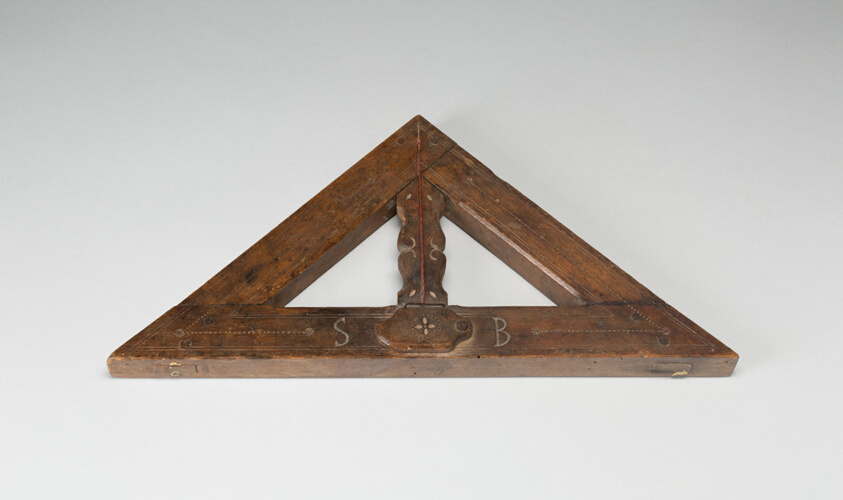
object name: Decorative Arts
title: Square and Level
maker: Germany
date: 17th century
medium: Wood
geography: Germany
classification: tool; european decorative arts; decorative arts